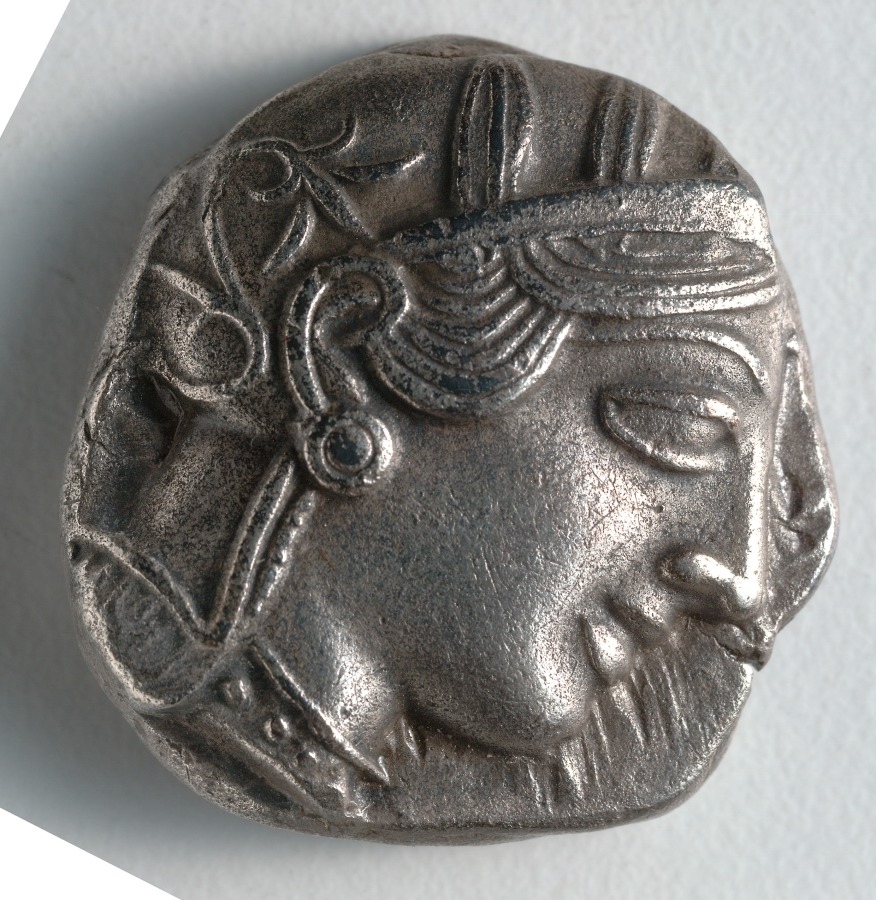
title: Tetradrachm: Head of Athena (obverse); Owl (reverse)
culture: Greek, minted at Athens (Attica)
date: 449–440 BCE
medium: silver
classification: Coins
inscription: ΑΘΕ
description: Incorporating the first three letters of the city name—ΑΘΕ—with then-iconic images of the patron goddess Athena and her owl, the Athenian tetradrachm was among the most widely traded and most recognizable coins of the ancient world. The olive leaves on Athena’s helmet and the small crescent moon behind the owl date this coin after the Persian Wars.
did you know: The images of Athena and her owl unmistakably identify this coin as Athenian.